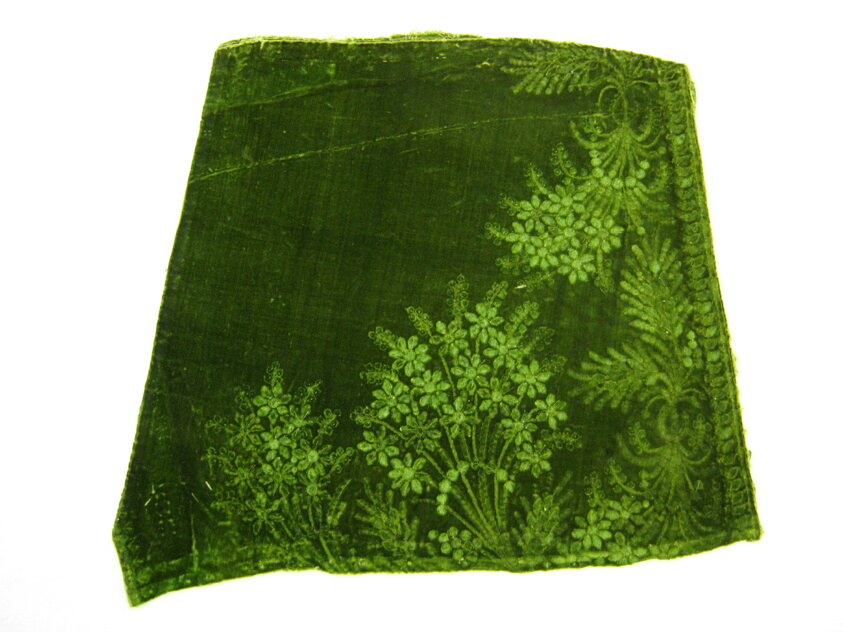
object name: Textile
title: Velvet Fragment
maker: France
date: 18th century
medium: Piece of green velvet.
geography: France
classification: textile; weaving; weaving - velvet